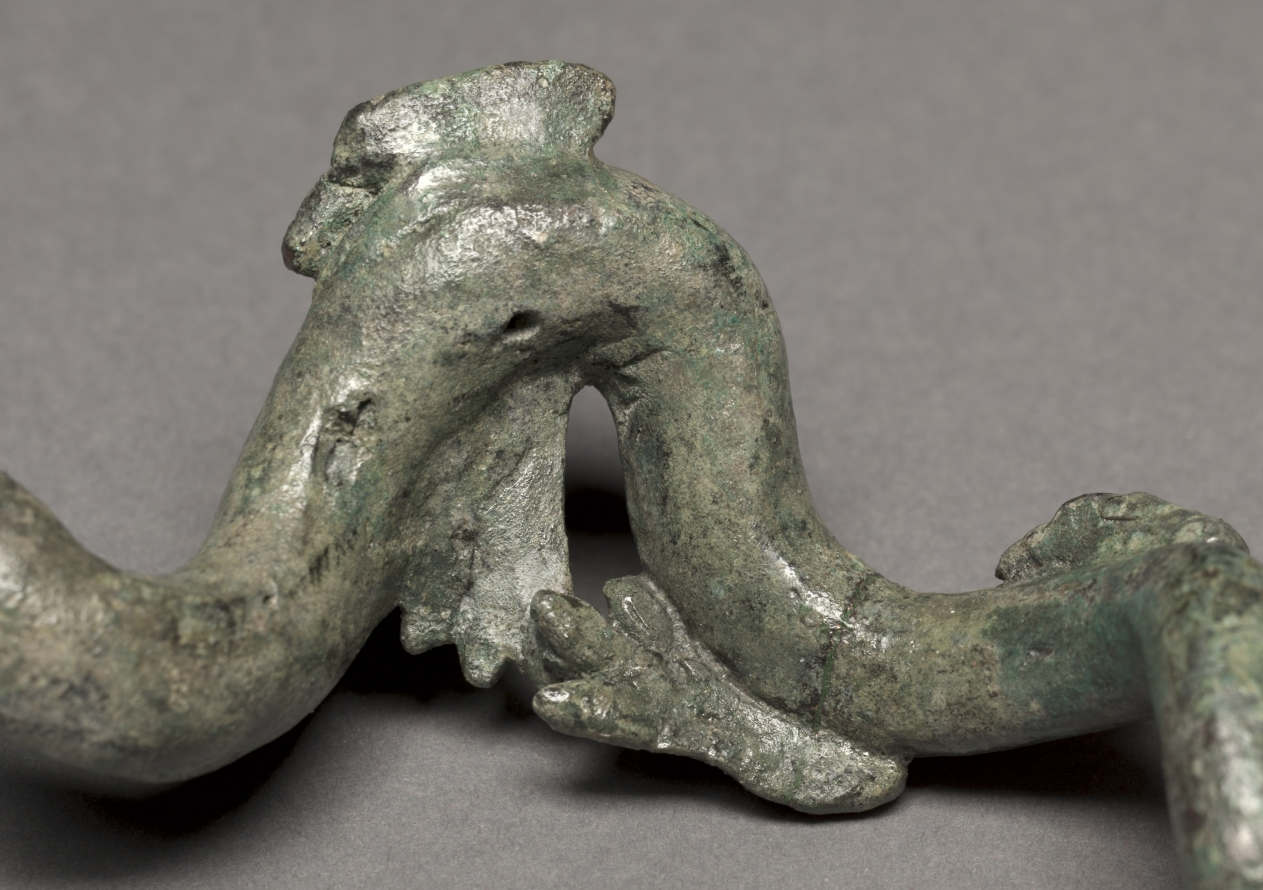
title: Detached Creature from the Cleveland Apollo: Apollo Sauroktonos (Lizard-Slayer) or Apollo the Python-Slayer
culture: Greece, Athens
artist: attributed to Praxiteles (Greek, Athenian, c. 400–330 BCE)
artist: or Follower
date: c. 350–200 BCE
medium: bronze, copper and stone inlay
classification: Sculpture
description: Both snakelike and lizardlike in appearance, the creature has a scaly head and four small feet. These are attached asymmetrically to its long and sinuous body, some with carefully delineated toes, others less detailed. The smallest foot falls behind a line bisecting the creature, where radiography shows a pin joining two separately cast sections. Although the bronze of the front and back halves is quite similar, the front half shows greater porosity (air bubbles). Perhaps the original back half was damaged during casting, necessitating a new or re-casting of that portion of the creature, with a smaller, relocated fourth leg.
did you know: Despite its small size, the creature was cast in two solid parts.